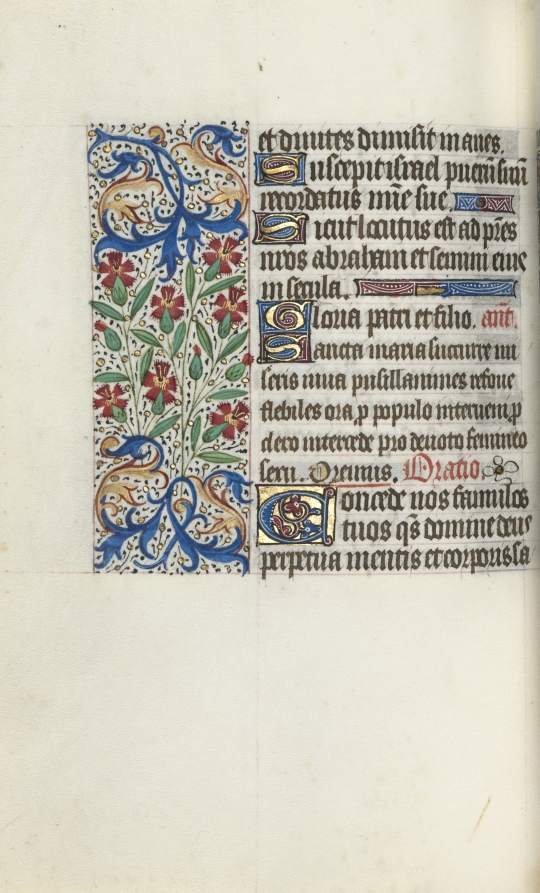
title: Book of Hours (Use of Rouen): fol. 74v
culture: France, Rouen, 15th century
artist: Master of the Geneva Latini (French, active Rouen, 1460–80)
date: c. 1470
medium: ink, tempera, and gold on vellum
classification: Bound Volume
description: In the late 1400s and early 1500s Rouen was an established and important center of book production. The city’s cathedral had a wealthy chapter that spent large sums of money to commission books and to maintain its extensive library. The stationers and booksellers would have likely been concentrated in or near the cathedral precinct. This artist, named after a manuscript now in Geneva, was Rouen’s principal illuminator during the second half of the 1400s.